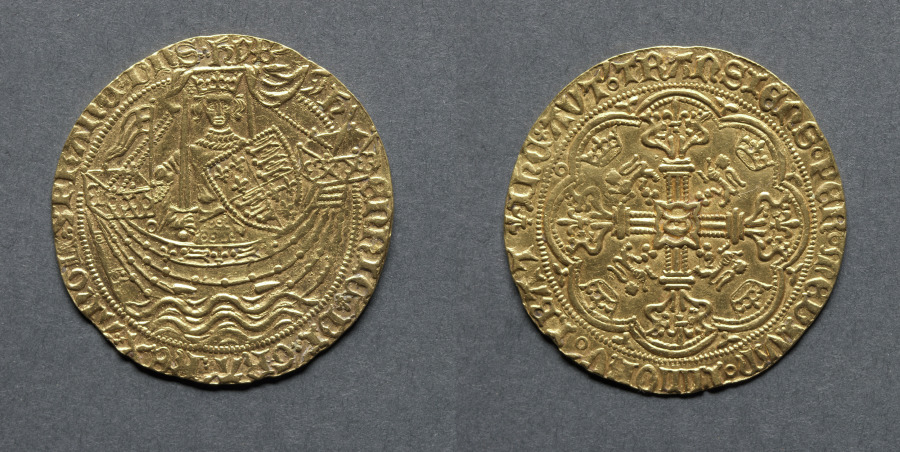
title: Noble: Henry VI in Ship with Shield of Arms (obverse); Ornamental Cross with Lis Terminals (reverse)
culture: England, Henry VI, 1422-1461 (restored 1470-1471)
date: 1422–61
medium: gold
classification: Coins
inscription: HENRIC DI GRA REX ANGL Z FRANC DNS HYB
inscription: IHC AUT TRANSIENS PER MEDIUM ILLORR IBAT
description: The Nobles of Henry VI were very much like those of the previous reign. The system of varying the stops, as annulets, pinecones, mascles, and so forth was introduced to help simplify the changes of privy marks, over 150 which helped identify the coin and where it was minted, which were required for the king's long reign.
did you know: Although struck throughout the reign of Henry VI, a shortage of gold meant fewer coins were being struck.